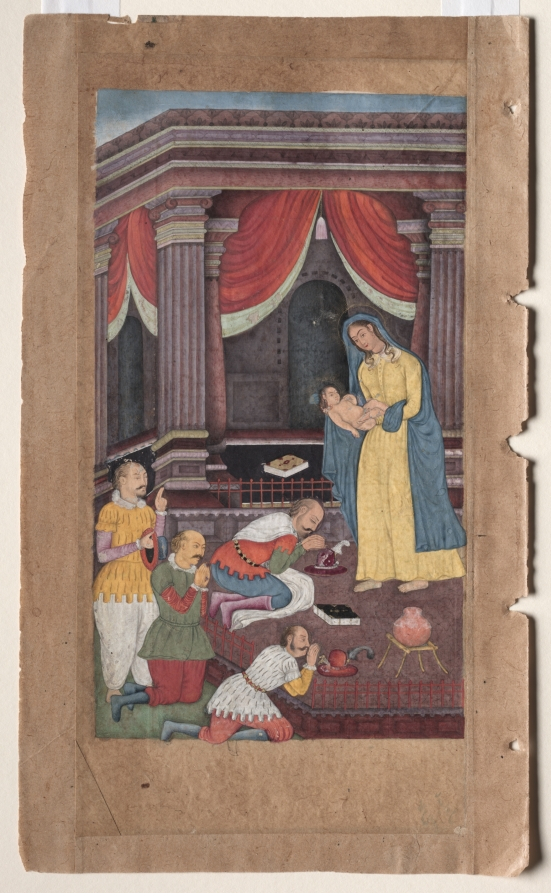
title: The Adoration of the Shepherds, from a Mirror of Holiness (Mir’at al-quds) of Father Jerome Xavier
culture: Mughal India, Allahabad, made for Prince Salim (1569–1627)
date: 1602–4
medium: Gum tempera, ink, and gold on paper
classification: Manuscript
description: Without reading the text, it would be difficult to identify the adorers as shepherds, because they are clothed as Portuguese merchants with ruffed collars and broad-brimmed hats. Mary stands with her divine newborn in a fenced enclosure, evocative of a sacred or royal space within a rather palatial setting, complete with pseudo-Ionic columns and heavy red draperies. The two books on the floor indicated to the Mughals that Christians, like Muslims, revere a definitive sacred scripture such as the Bible or the Koran.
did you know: The finishing details on this painting, such as two of the shepherds’ feet, the tile patterning, and probably arabesques, have not been completed.